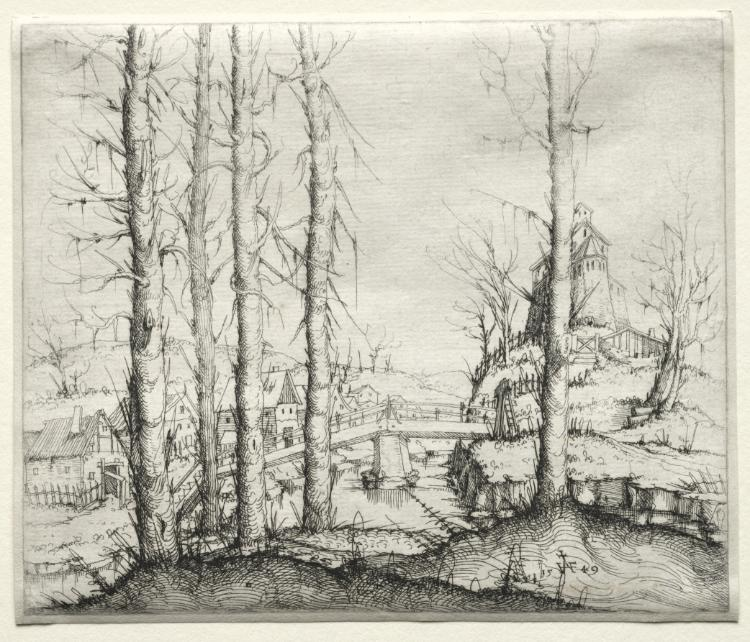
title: River Landscape with Five Bare Spruce Trees in the Foreground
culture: Germany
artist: Augustin Hirschvogel (German, 1503–1553)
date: 1549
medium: etching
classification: Print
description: Within a decade, Augustin Hirschvogel and Hanns Lautensack were aware of the landscapes by Wolfgang Huber and Albrecht Altdorfer and began to expand their artistic vocabulary. Hirschvogel probably made this group of etchings after traveling down the Danube from Nuremberg, through Regensburg and Passau, to his residence in Vienna. The many buildings, cultivated fields, and roads emphasize human activity and its mark on the landscape but always in the service of articulating a particular topography. Hirschvogel’s etchings found an international audience, informing the development of the landscape genre as far away as Italy and the Netherlands.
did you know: An early adopter of etching, Augustin Hirschvogel was among the first artists in Germany to use a copper, rather than iron, etching plate.